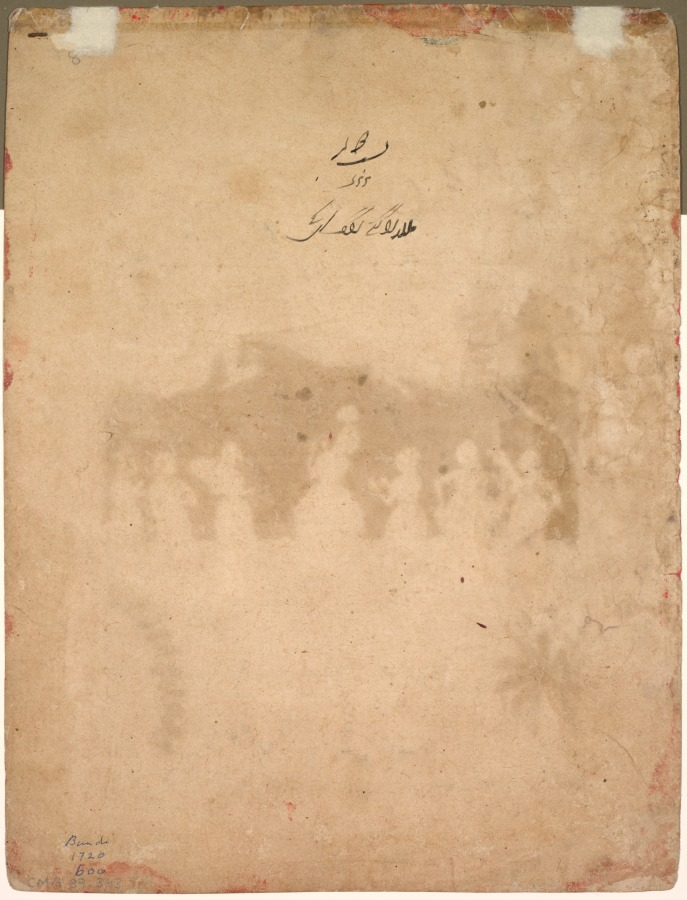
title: Malar Ragini: Krishna Playing the Flute to Seven Gopis Holding Musical Instruments, from the Ragamala Series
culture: India, Rajasthan, Bundi-Kota, 18th century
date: c. 1760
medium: color with gold and silver on paper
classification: Painting